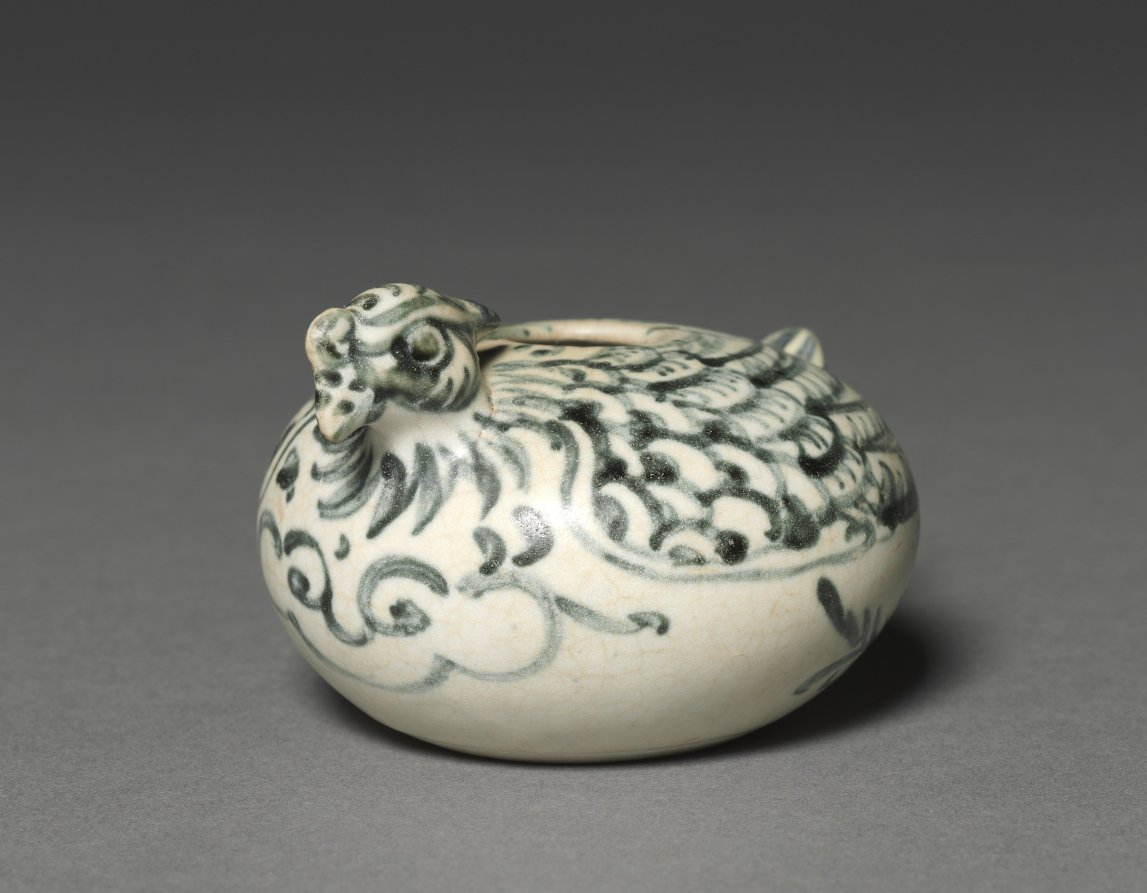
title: Bird-Shaped Jar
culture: Vietnam (Annam)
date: 1400s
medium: porcelain with underglaze blue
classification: Ceramic